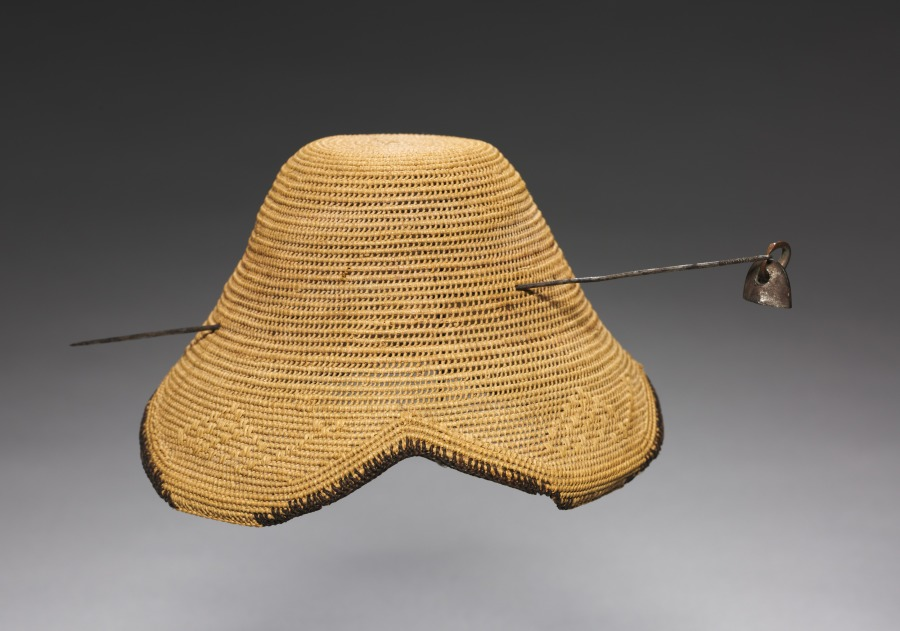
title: Hat (laket)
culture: Africa, Central Africa, Democratic Republic of the Congo, Kuba-style maker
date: early 1900s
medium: Raffia and dye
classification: Garment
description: Titled Kuba men and prominent women wear the laket, a small ornate dome-shaped hat. An essential fashion item of adult men in good social standing, it focuses special attention on the head as a significant marker of individual identity, ethnic affiliation, status, and role in society. This prestige object is secured on the crown of the head with a nine-and-a-half-inch metal pin that pierces through the hat onto a clump of hair. This laket is made from raffia palm fiber coiled into threads and woven in different patterns. There are two examples of the laket: the plain type with the flat top, and the more elaborate type called the laket mishiing.